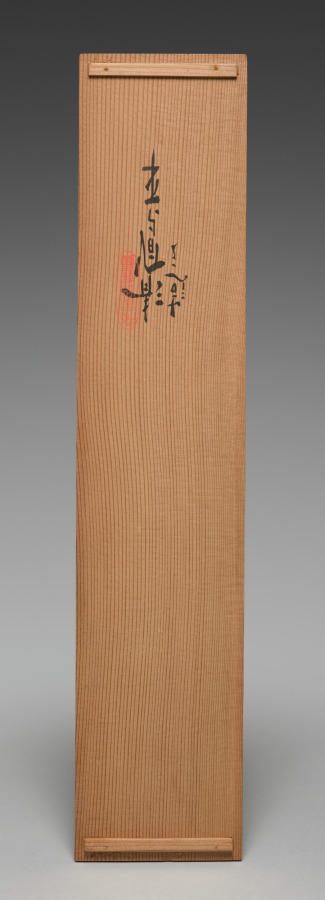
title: Maple Leaf-Shaped Saucers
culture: Japan, Meiji period (1868–1912)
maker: Seifū Yohei III (Japanese, 1851–1914)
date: 1893–1914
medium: Set of five saucers; porcelain with molded design and blue glaze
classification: Ceramic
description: These maple leaf–shaped saucers, like Yohei III's 5 shell saucers CMA 2022.188, have a long, horizontal box with a separate compartment for each piece. Now a set of 5, these dishes were originally a set of 10, stored in two boxes of 5 each. From their housings, which accommodate differing numbers of objects, one can hypothesize that while some items created by the Seifu studio were intended to be acquired in larger sets, and thus were perhaps made to order, others, like these, may have been items to be purchased off the shelf in set quantities that allowed clients flexibility in scale. The box for thesev5 saucers describes them as “heavenly blue[–glazed] porcelain” (tenseiji). The veins of the leaves are slightly raised in the clay so that the glaze pools around them and they stand out as white where the glaze thins. There are longer lines at the points of the leaves and shorter ones following the wall of each indentation so that the design has both a horizontal and a subtle vertical dimension. Each saucer has a round foot.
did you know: These saucers shaped like maple leaves show Seifū Yohei III’s “heavenly blue glaze.”